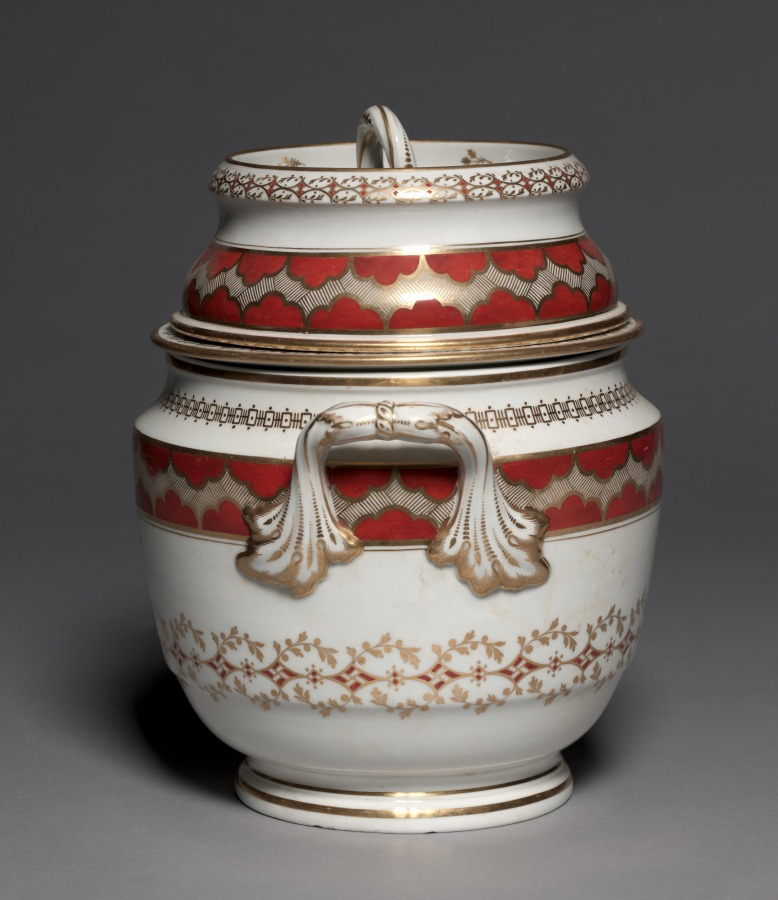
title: Ice Pail (1 of 2)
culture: England, late 18th-early 19th Century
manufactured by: Flight & Barr (British)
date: 1793–1807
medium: porcelain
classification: Ceramic